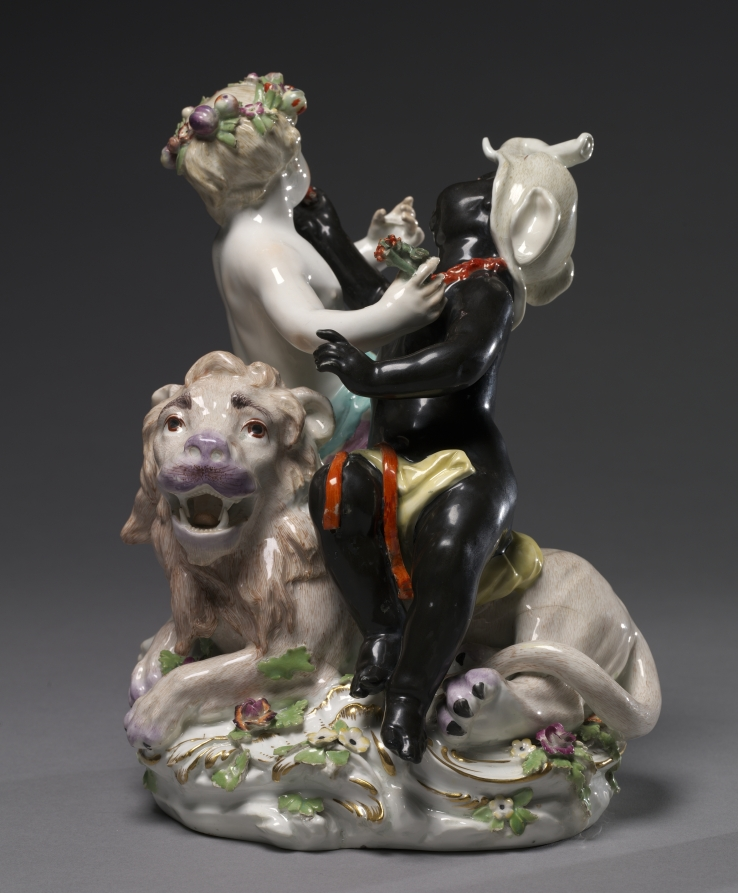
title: Figure of Asia and Africa from the Four Continents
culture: England, Chelsea, mid-18th century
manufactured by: Chelsea Porcelain Factory (Britain, London, 1745–84)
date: c. 1760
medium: soft-paste porcelain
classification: Ceramic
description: Often collected by wealthy British merchants who were beneficiaries of colonial expansion, figural groups were frequently part of elaborate table decorations meant to signify wealth and global dominance. In this work, Africa, who wears an elephant headdress and holds a scorpion in one hand, wrestles with Asia, who is surrounded by perfumes and native fruits. These depictions of Africa and Asia reveal a purely imagined understanding of faraway places.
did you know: Figural representations of the four continents date back to the 1500s, but such imagery became even more popular in the 1700s as European empires expanded.